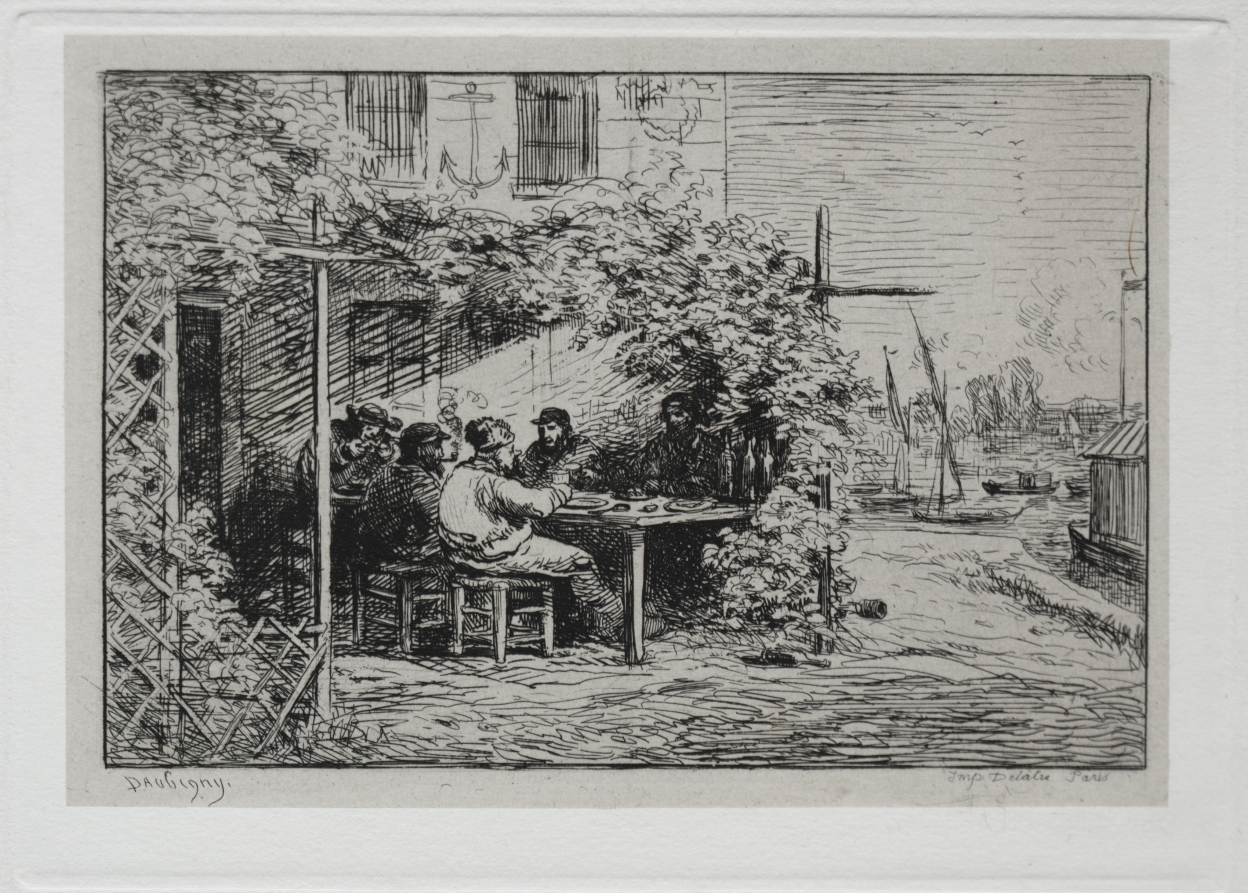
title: The Boat Trip: The Lunch before Going Aboard at Asnières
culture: France, 19th century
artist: Charles François Daubigny (French, 1817–1878)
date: 1861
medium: etching with chine collé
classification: Portfolio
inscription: lower left corner, in graphite: L. D. 100